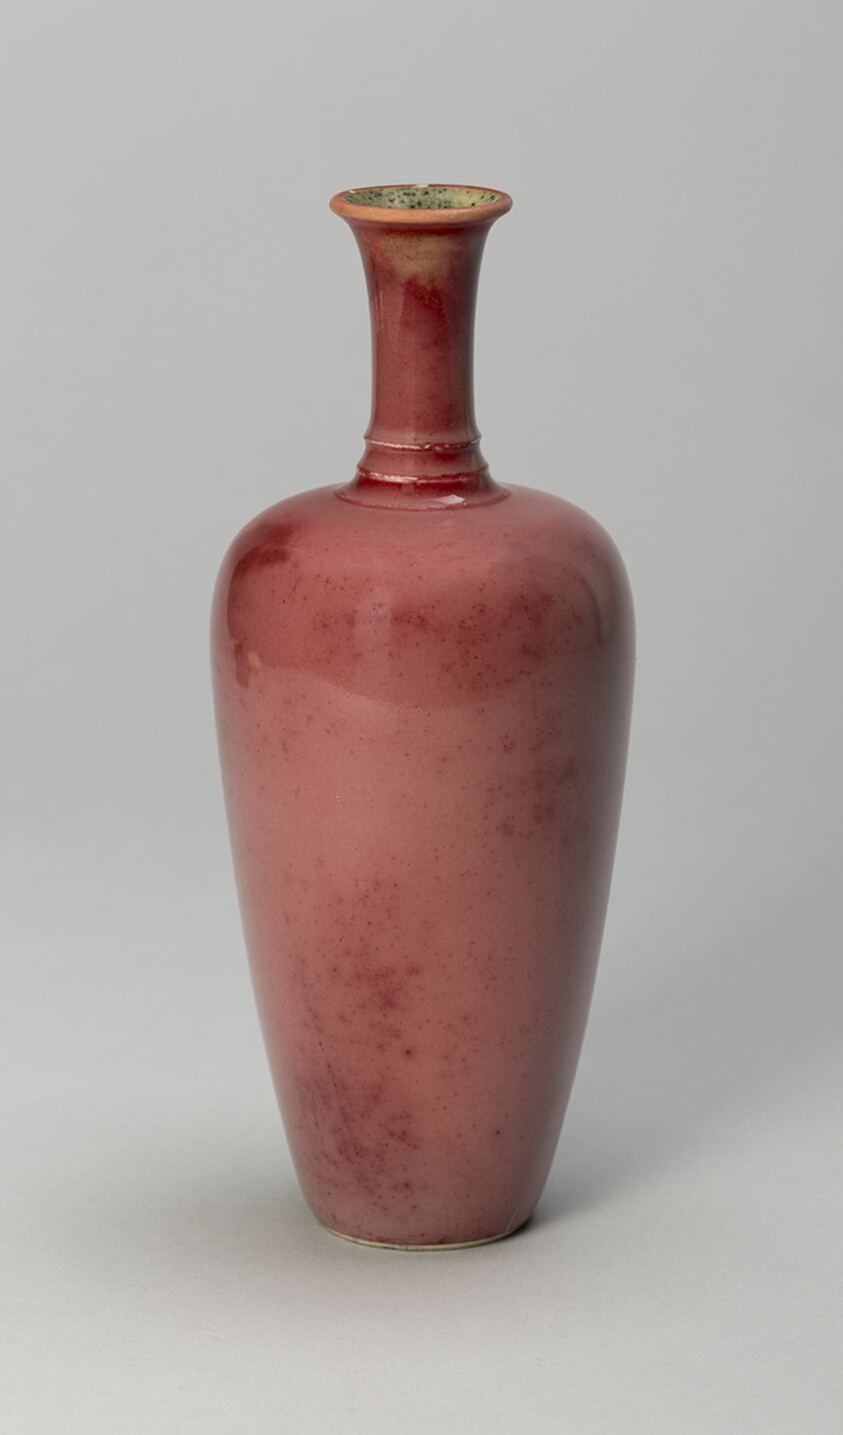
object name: Ceramics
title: "Three-String" Bottle Vase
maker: China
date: Qing dynasty (1644–1911), Kangxi reign mark and period (1662–1722)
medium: Porcelain with copper-red (peachbloom) glaze and underglaze molded decoration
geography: China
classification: porcelain; asian art; ceramics